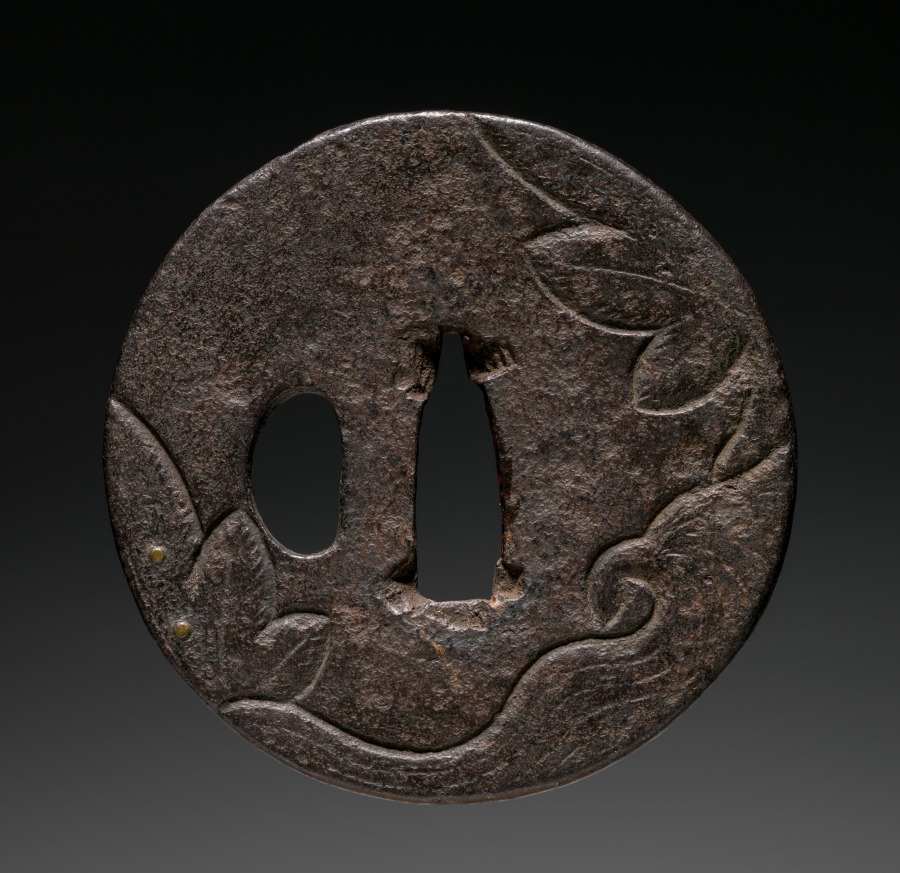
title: Sword Guard (Tsuba) with Maple Leaves on River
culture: Japan, possibly Edo period (1615-1868)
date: c. 1615–1868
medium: iron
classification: Arms and Armor